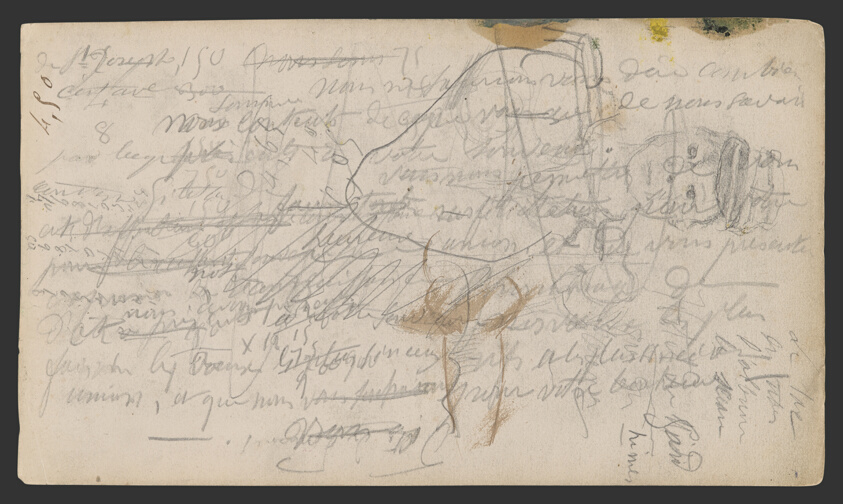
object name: Drawing and Watercolor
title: Sketchbook No. 2 (L'Estaque)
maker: Paul Cézanne; French, 1839-1906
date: 1875–86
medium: Graphite and pen and ink drawings on paper, bound into a book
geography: France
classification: sketchbook; graphite; prints and drawing; paper